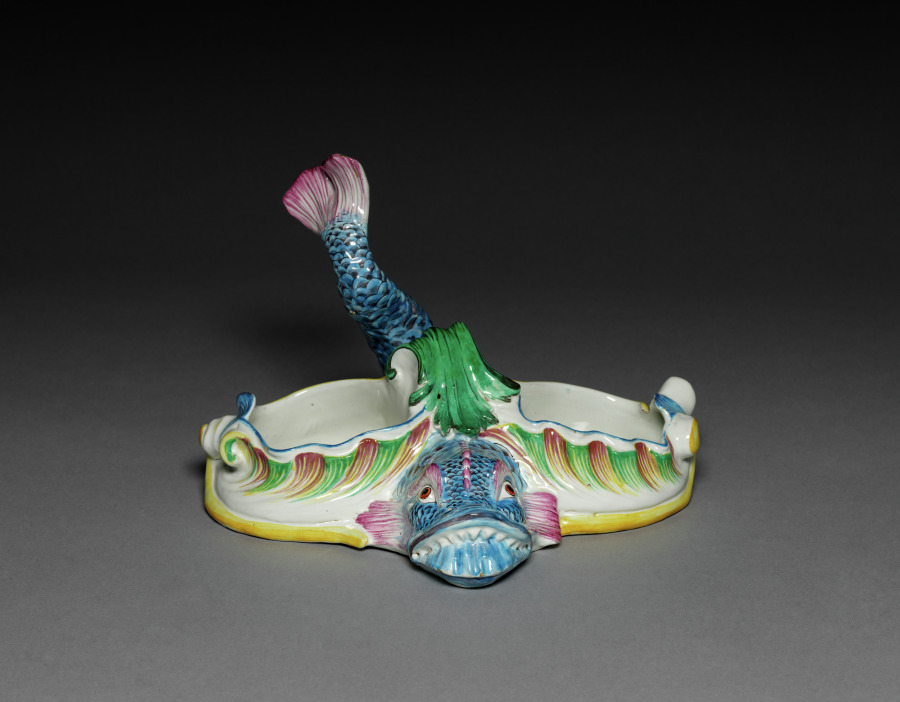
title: Center Piece with Dolphin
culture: Germany, Höchst, 18th century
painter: Johannes Zeschinger (German, 1723-)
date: 1750–1775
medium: faience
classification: Ceramic